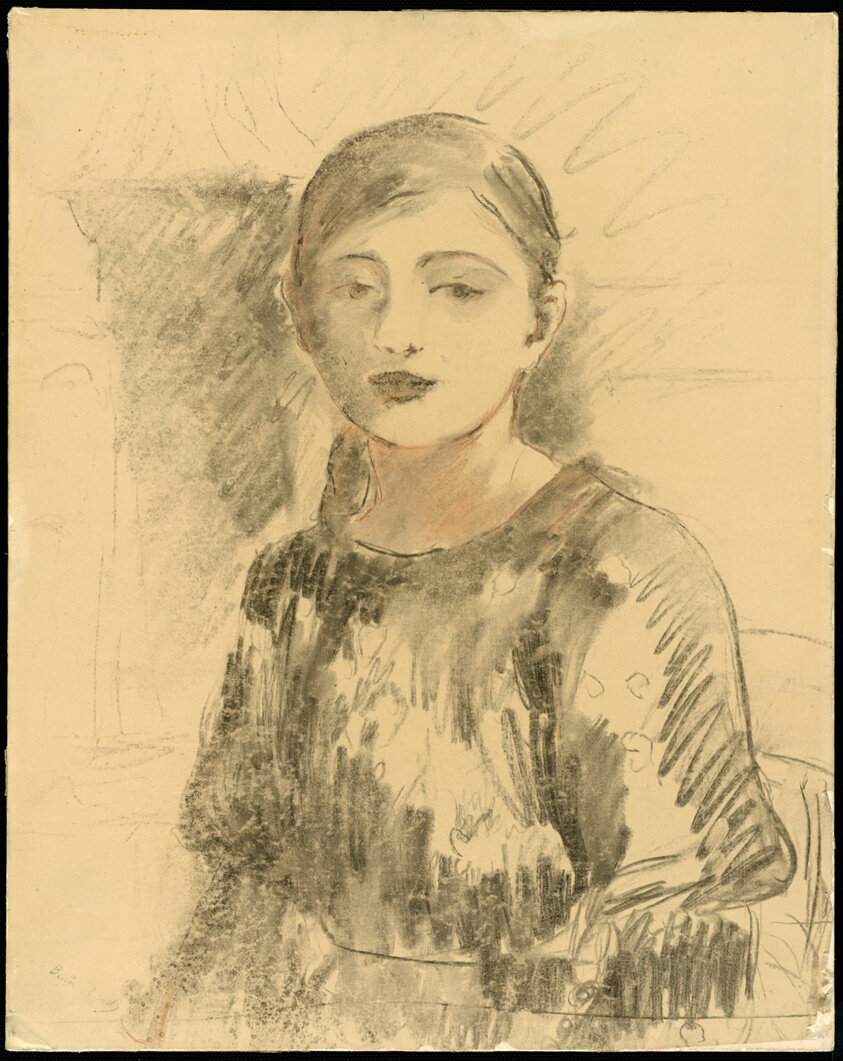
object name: Drawing and Watercolor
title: Portrait of Julie Manet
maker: Berthe Morisot (French, 1841–1895)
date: 1890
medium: Transfer drawing in charcoal and red chalk, on light tan tracing paper, laid down on white wove paper, wrapped around millboard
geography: France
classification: prints and drawing; chalk; charcoal; drawings (visual works)